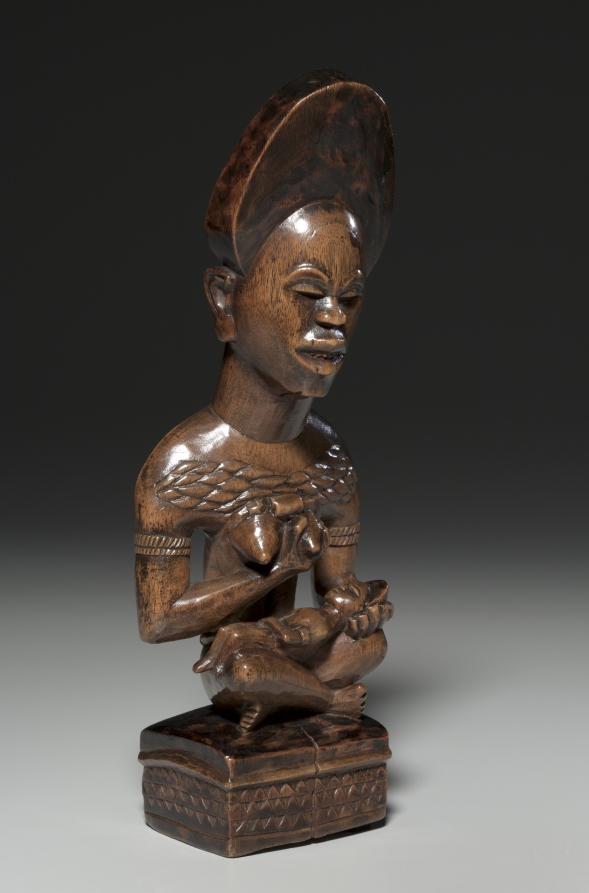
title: Woman and Child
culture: Africa, Central Africa, Democratic Republic of Congo, Yombe-style carver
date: mid- to late 1800s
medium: Wood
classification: Sculpture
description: This mother-and-child figure was probably part of a cult concerned with the treatment of infertility. Both her jewelry and her seated pose indicate that the woman occupied a high rank in her community. Her miter-shaped hairstyle, chiseled teeth, and raised body scars--considered to be marks of beauty and perfection--signal that the woman incarnates the founding ancestor of a kinship group.